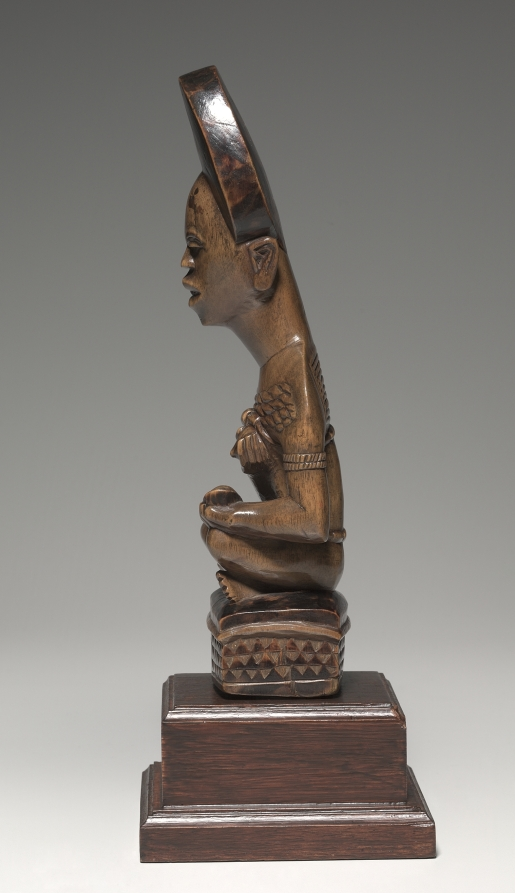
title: Woman and Child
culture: Africa, Central Africa, Democratic Republic of Congo, Yombe-style carver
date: mid- to late 1800s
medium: Wood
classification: Sculpture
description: This mother-and-child figure was probably part of a cult concerned with the treatment of infertility. Both her jewelry and her seated pose indicate that the woman occupied a high rank in her community. Her miter-shaped hairstyle, chiseled teeth, and raised body scars--considered to be marks of beauty and perfection--signal that the woman incarnates the founding ancestor of a kinship group.